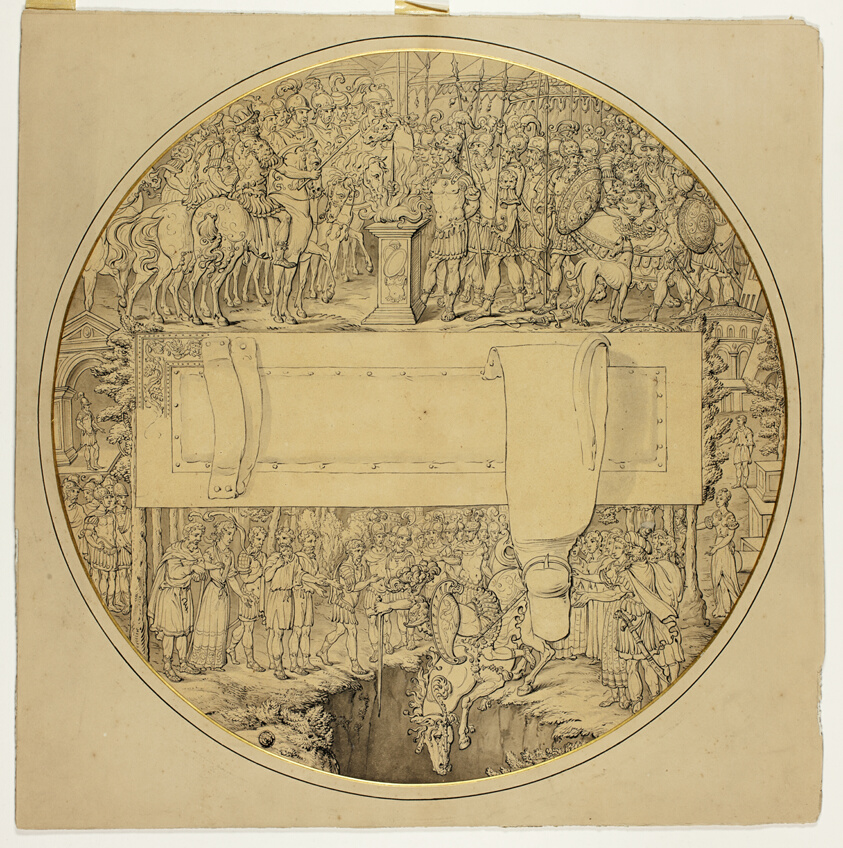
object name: Drawing and Watercolor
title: Ceremonial Shield with Roman Battle Scene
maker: Attributed to William Burgess; English, 1749-1812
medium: Pen and black ink, with brush and gray wash, on tan wove paper, edge mounted to wood pulp board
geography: England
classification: pen and ink drawings; drawings (visual works); prints and drawing